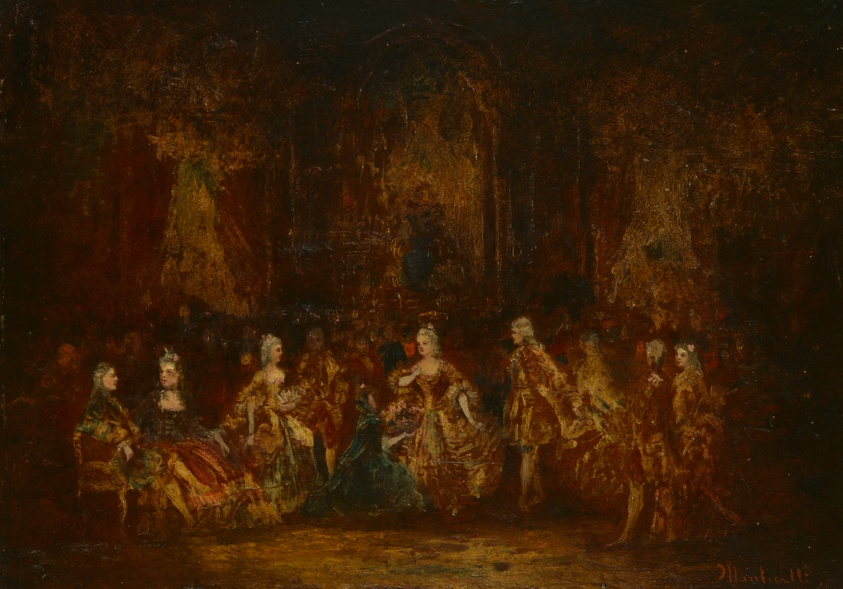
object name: Painting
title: Persons in Louis XV Costumes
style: nineteenth century, 19th century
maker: Adolphe Monticelli (French, 1824–1886)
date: c. 1880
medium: Oil on cradled panel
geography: France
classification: oil on panel; french; paint; oil paintings (visual works); painting; european painting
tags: costume, women, wealth, men, luxury, interior, festivals